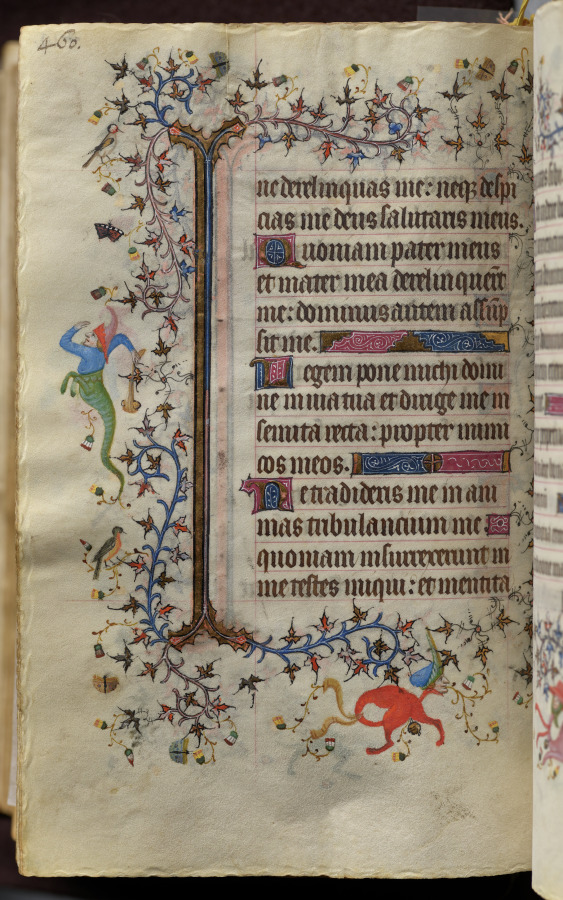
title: Hours of Charles the Noble, King of Navarre (1361-1425): fol. 224v, Text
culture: France, Paris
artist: Master of the Brussels Initials and Associates (French)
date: c. 1405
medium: ink, tempera, and gold on vellum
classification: Bound Volume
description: This precious volume was obviously highly prized by its owner, the French-born King of Navarre, who had his coat of arms painted on no less than twenty folios. Rather than directly commissioning this manuscript from a specific workshop, it seems that Charles the Noble acquired his book of hours -- perhaps ready-made for the luxury market -- while on a trip to Paris in 1404-05. A collaborative effort, six painting styles are evidenced within the pages of this codex, those of two Italians, two Frenchmen, and two Netherlanders. The painter who was responsible for the planning and decoration of the book, and who produced seventeen of the large miniatures, was a Bolognese artist known as the Master of the Brussels Initials. His principal assistant, responsible for most of the borders, was a Florentine who signed his name "Zecho" da Firenze on folio 208 verso.